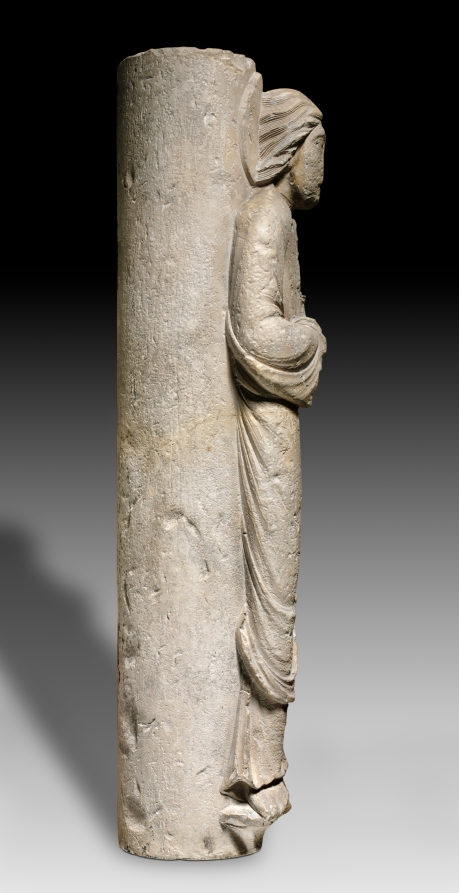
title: Columnar Figure of an Apostle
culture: France, Champagne, Châlons-sur-Marne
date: c. 1180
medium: limestone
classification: Sculpture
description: This figure of an apostle, probably Saint John the Evangelist, attached to its supporting column, came originally from the cloister of the Church of Notre-Dame-en-Vaux at Châlons-sur-Marne. A cloister was a covered walkway usually around all four sides of a square area of grass (the "cloister garth"). The seclusion of the cloister was the exclusive domain of the monks or clergy and off-limits to others. Here, the monks were able to pray, study, meditate, and exercise in privacy and solitude. This figure illustrates the transition in style from Romanesque to Gothic taking place in ecclesiastical buildings across northern France during the late 1100s.